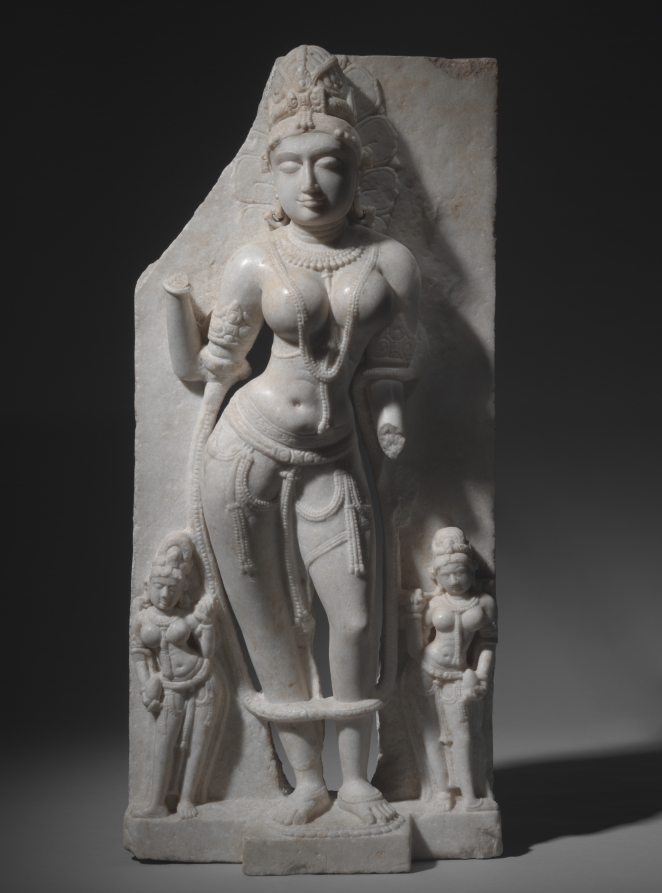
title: Vidyadevi (Goddess of Learning)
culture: India, Western Rajasthan, 10th-11th century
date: 900s-1000s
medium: marble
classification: Sculpture